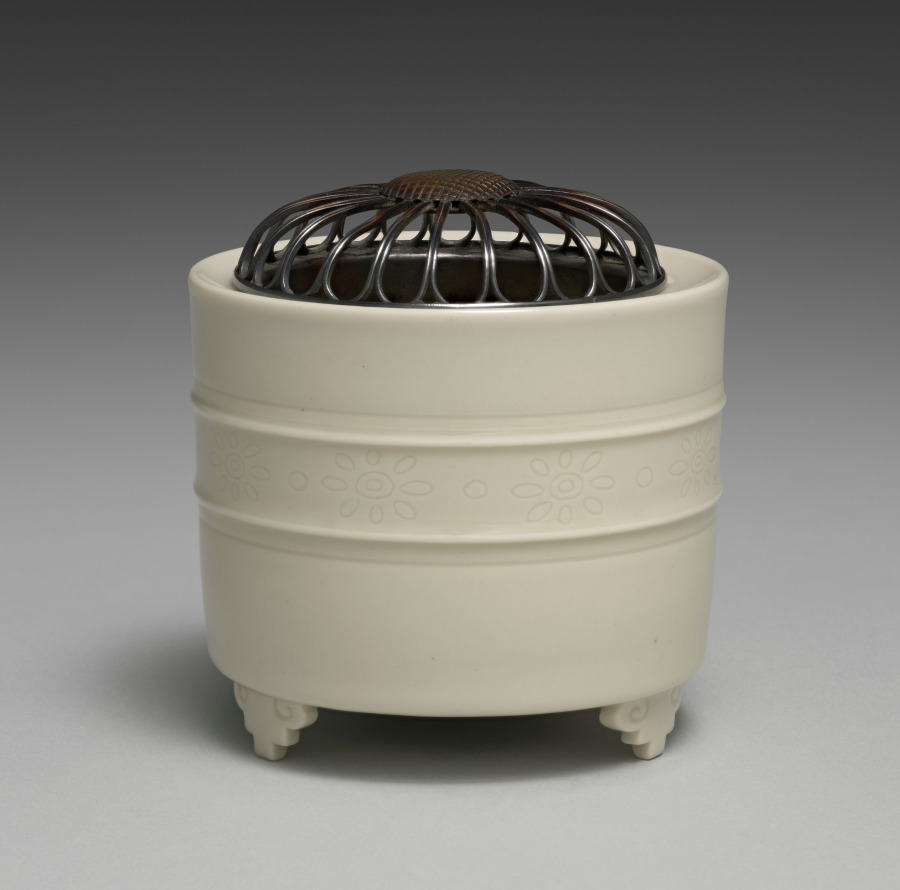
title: Incense Burner with Flowers and Dots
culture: Japan, Meiji period (1868–1912)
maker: Seifū Yohei III (Japanese, 1851–1914)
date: 1893–1914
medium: Porcelain with creamy white translucent glaze and molded and incised design with openwork silver lid in shape of flower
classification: Ceramic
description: Yohei III made incense burners in a wide variety of designs and styles. The body and glaze of this one are taihakuji, or “great white porcelain,” an important early invention Yohei III devised in 1872 that involved the combination of a distinctive translucent, creamy glaze over an ivory-colored clay body. The silver lid is meant to look like a single flower. The vessel has tapering legs with a combined curvilinear and geometric design; the bands encircling the middle have simple, incised flower motifs alternating with single dots.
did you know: This incense burner has floral motifs on both the lid and the burner.